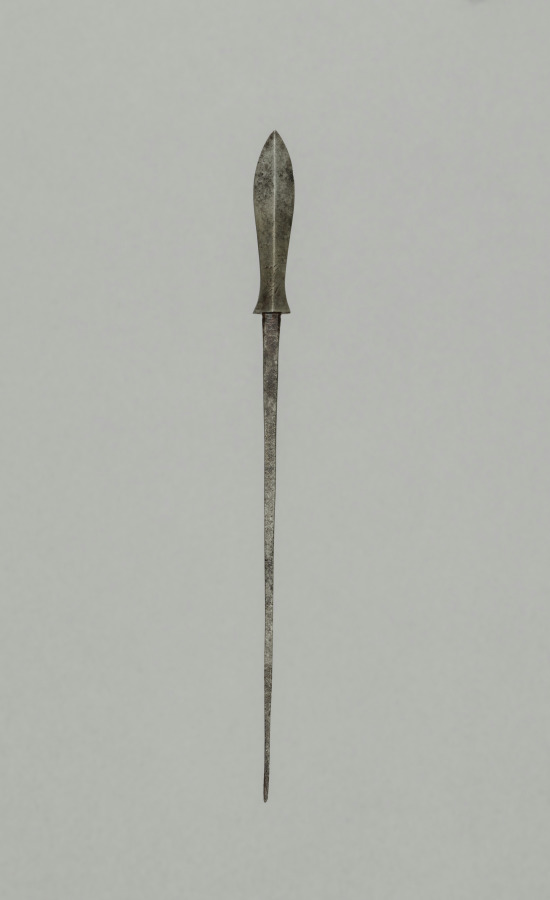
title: Arrow Point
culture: Japan, Edo period (1615–1868)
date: 1700s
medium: steel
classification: Arms and Armor